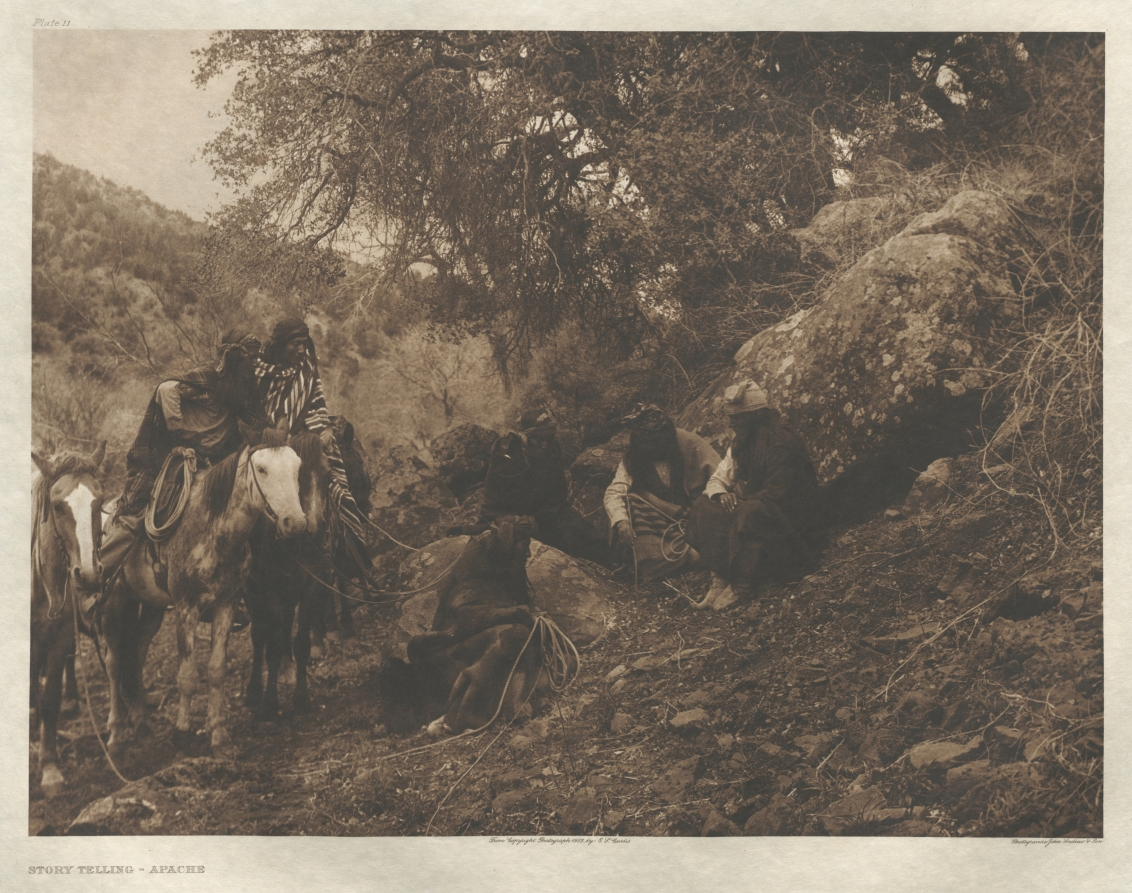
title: Portfolio I, Plate 11: Story Telling-Apache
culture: America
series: The North American Indian: being a series of Portfolios picturing and describing the Indians of the United States, the Dominion of Canada, and Alaska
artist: Edward S. Curtis (American, 1868–1952)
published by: The University Press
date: 1903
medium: photogravure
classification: Portfolio